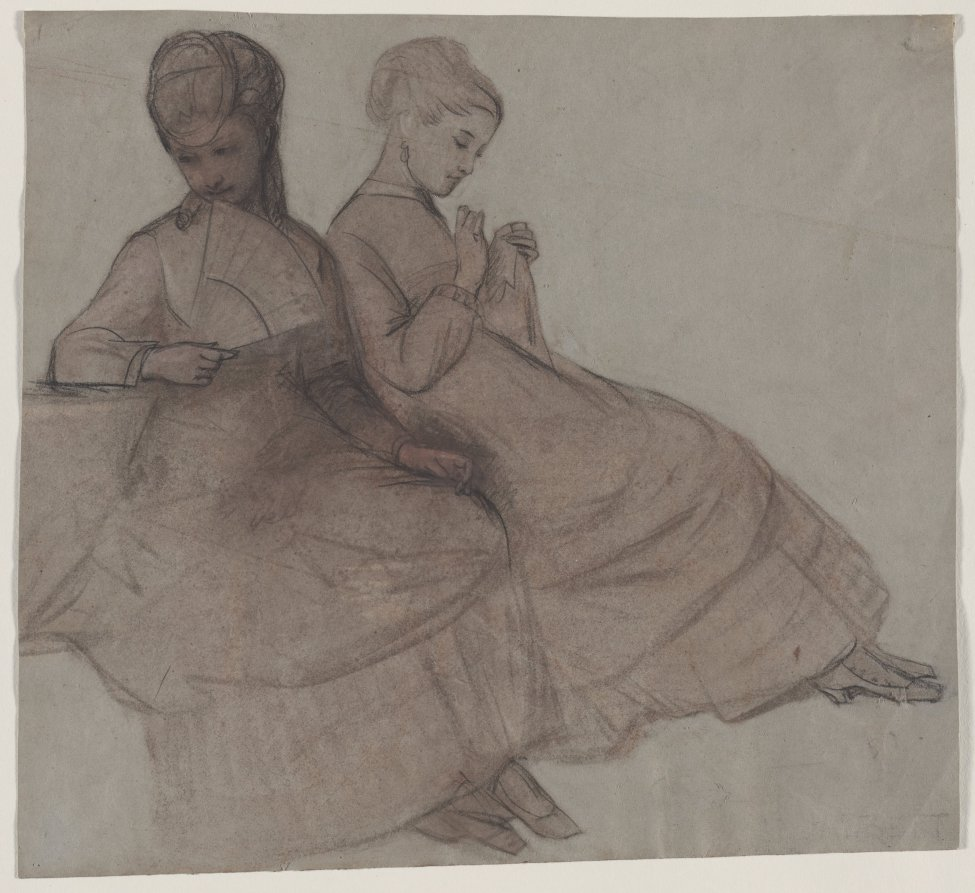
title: Two Young Women Seated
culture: France, late 19th-early 20th Century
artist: attributed to Lucien Simon (French, 1861–1945)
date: last third 19th century or first half 20th century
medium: black and brown crayon, with white chalk (wetted and stumped in places)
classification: Drawing